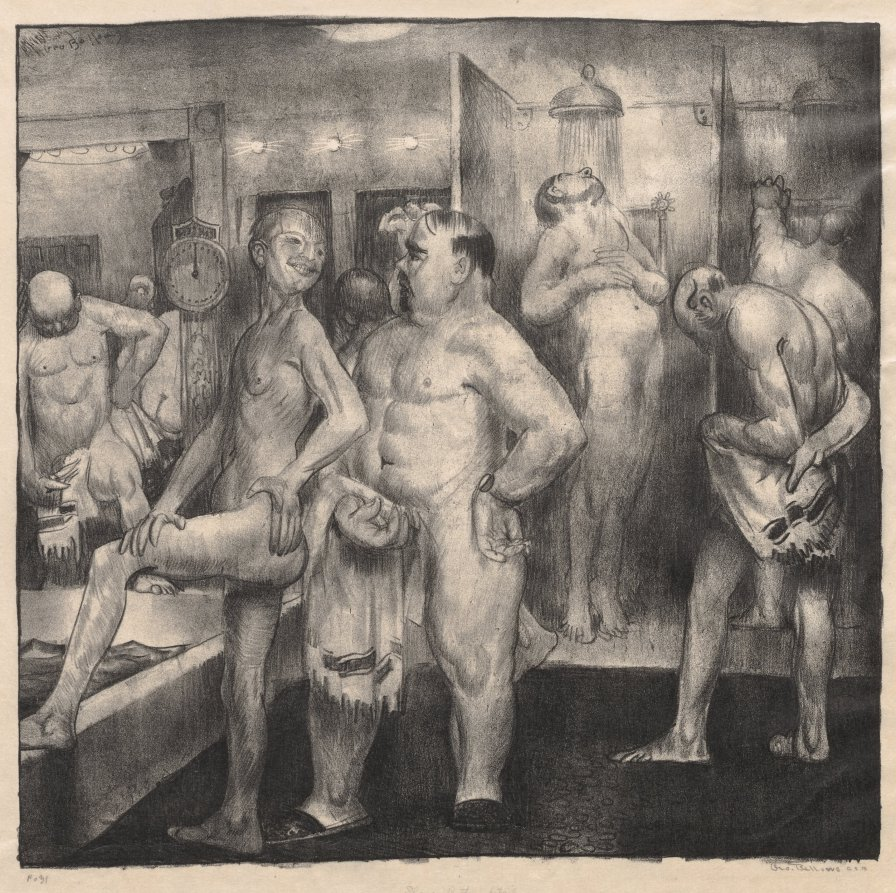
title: Shower-Bath, Detail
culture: America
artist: George Bellows (American, 1882–1925)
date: 1916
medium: lithograph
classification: Print